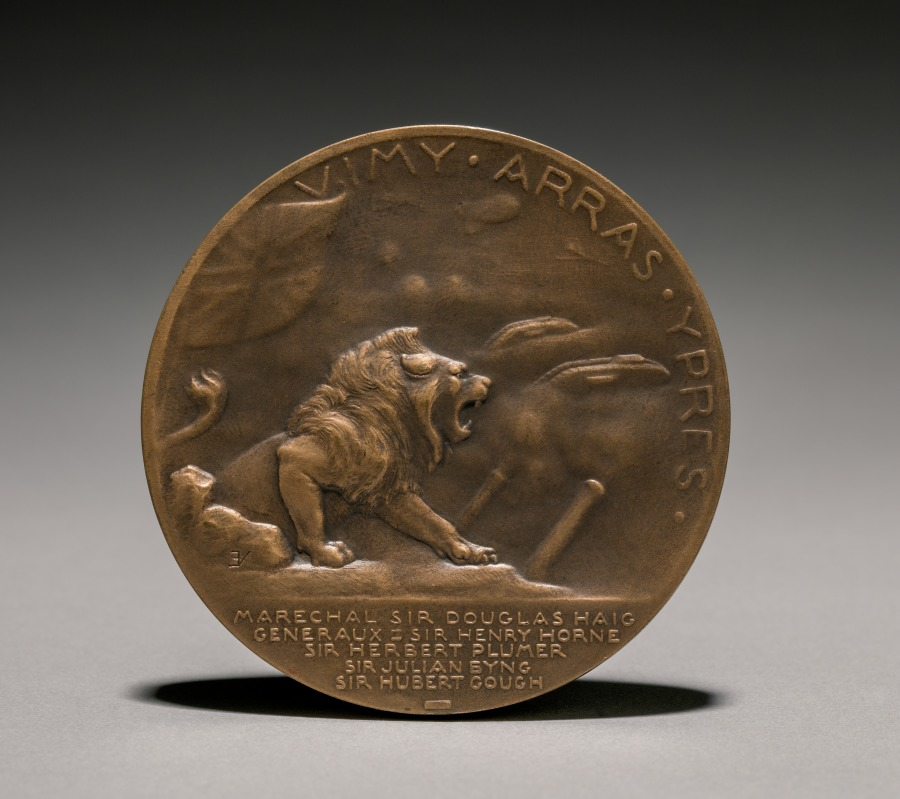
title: Medal (reverse)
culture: France, early 20th century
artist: Èmile Séraphin Vernier (French, 1852–1927)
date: 1921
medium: bronze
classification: Metalwork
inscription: "Vimy, Arras, Ypres, Marechal Sir Douglas Haig, Generaux Sir Henry Horne, Sir Herbert Plumer, Sir Julian Byng, Sir Hubert Gough."